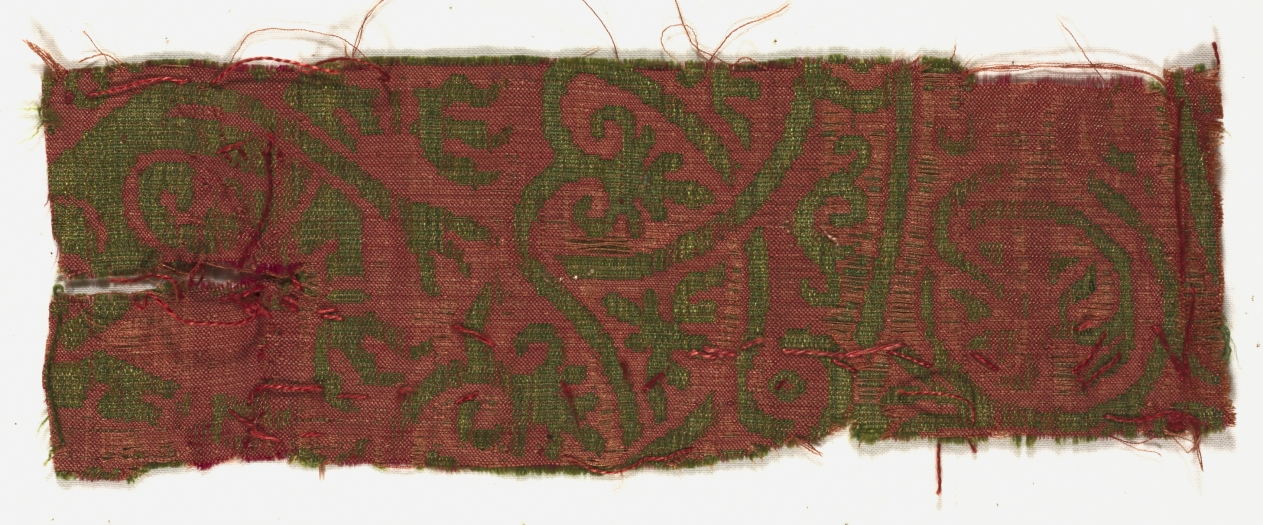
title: Silk Fragment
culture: Spain, Islamic period or Mudejar, 13th century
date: 13th century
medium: lampas weave, brocaded; silk and gold thread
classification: Textile